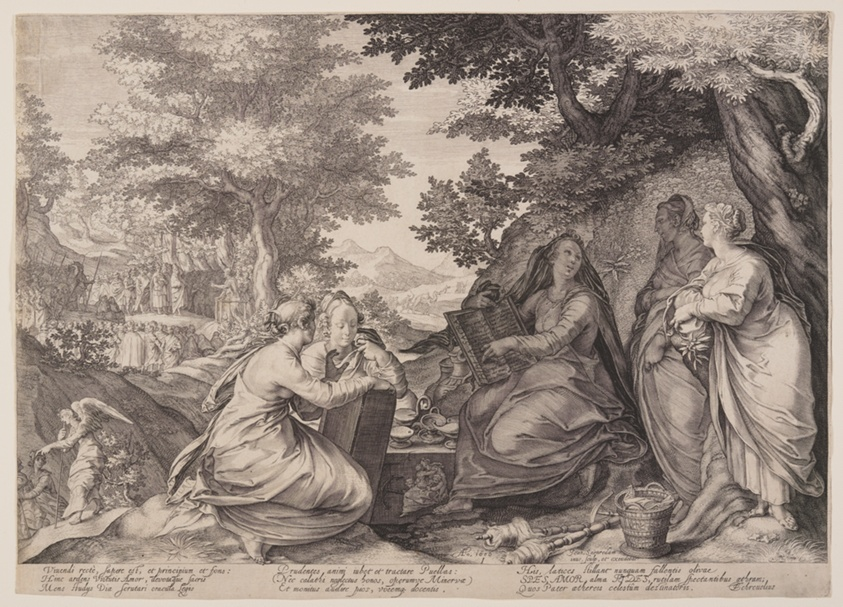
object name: Print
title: Wise Virgins Gathered Together in a Landscape Before the Preaching of the Baptist, from Parable of the Wise and Foolish Virgins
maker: Jan Saenredam (Dutch, 1565–1607)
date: 1606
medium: Engraving on ivory laid paper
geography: Netherlands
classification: engraving; paper; print; prints and drawing